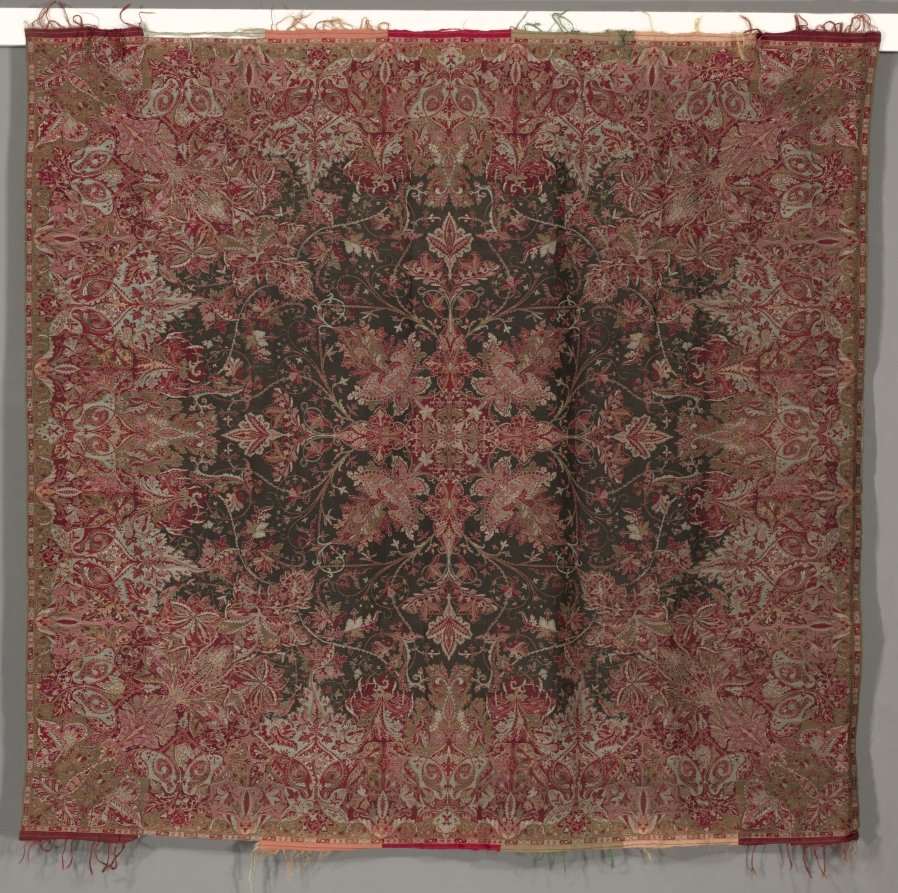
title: Square Shawl with Quarter Shawl Layout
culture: Austria, England, France, or Scotland, 19th century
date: 1840s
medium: supplementary weft pattern; silk & wool?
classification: Textile